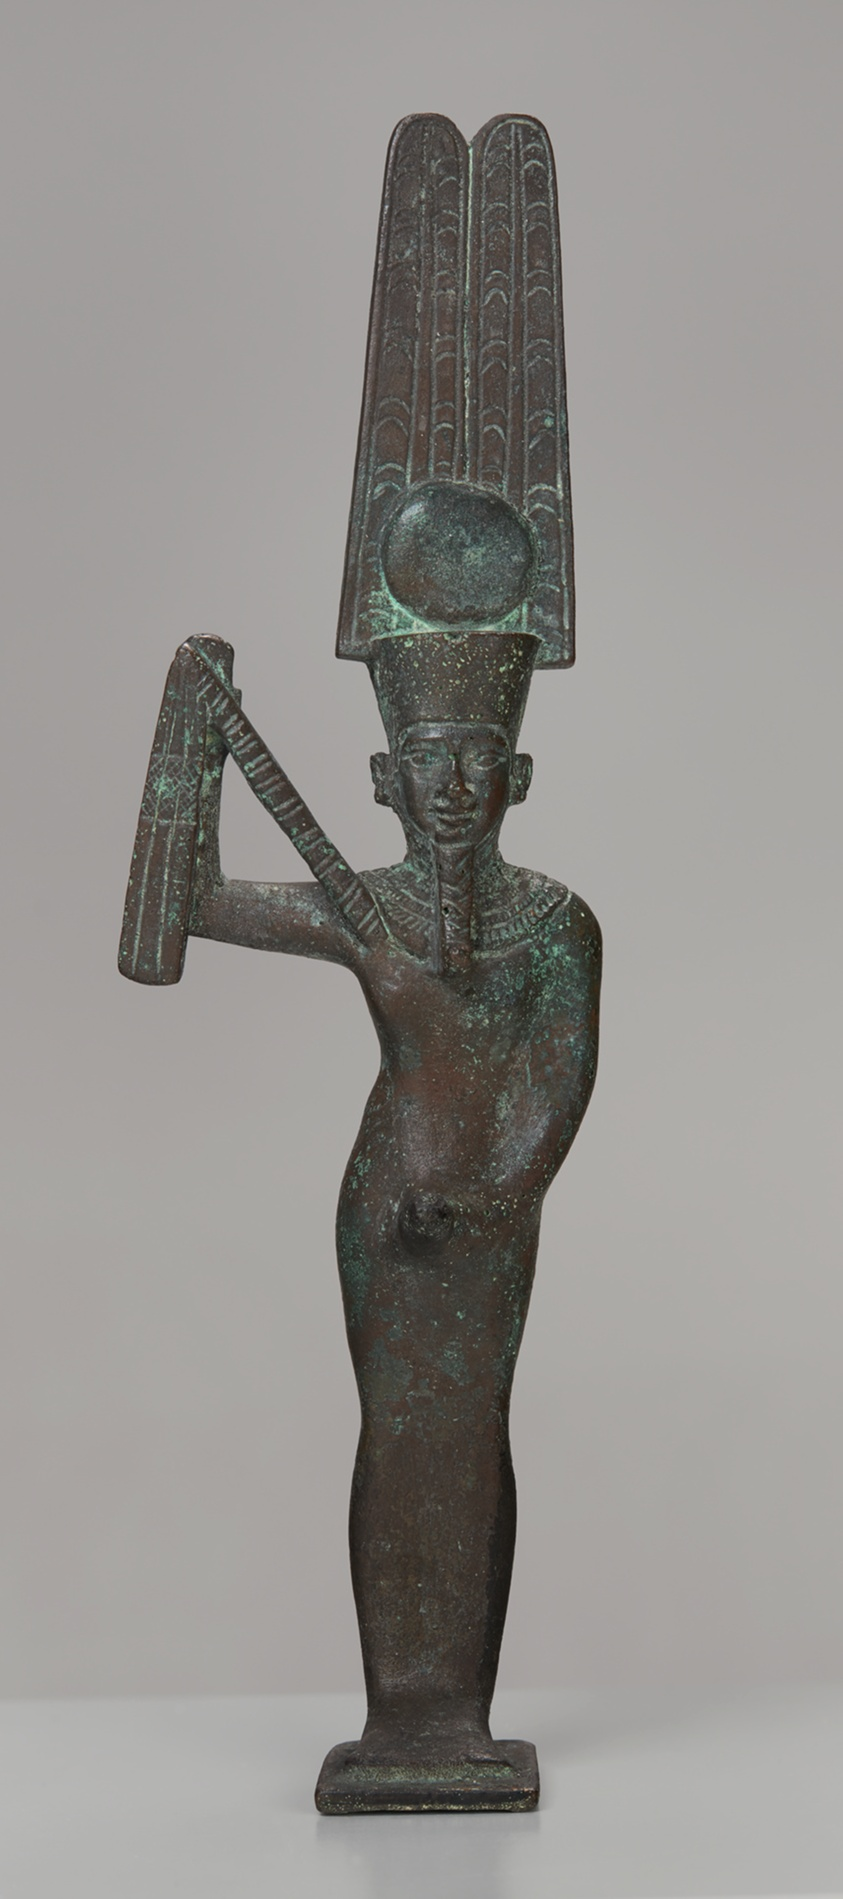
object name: Sculpture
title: Statuette of the God Min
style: late period (egyptian), egyptian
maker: Egyptian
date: Late Period, Dynasties 26–31 (664–332 BCE)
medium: Copper alloy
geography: Egypt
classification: statuette; bronze; metal; sculpture; ancient art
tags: gods (deities)